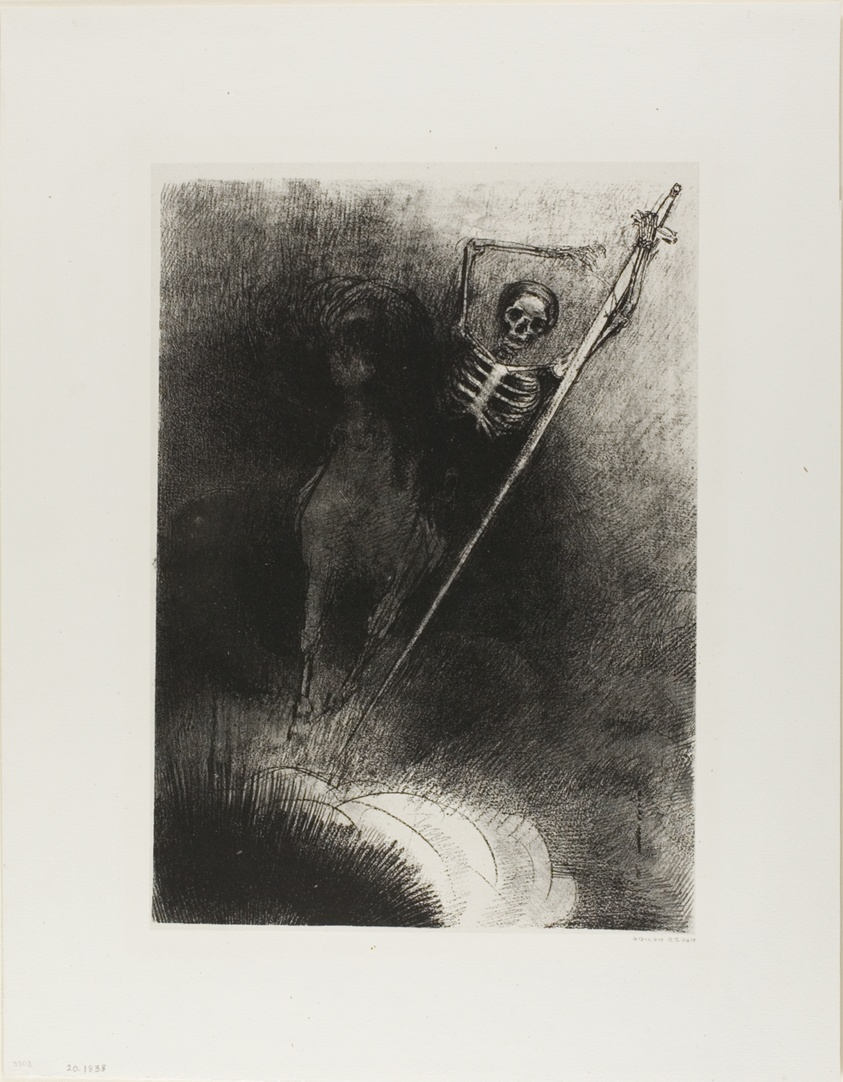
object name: Print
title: And His Name That Sat On Him Was Death, plate 3 of 12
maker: Odilon Redon (French, 1840-1916)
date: 1899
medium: Lithograph in black on cream China paper laid down on ivory wove paper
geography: France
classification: lithograph; print; prints and drawing; paper